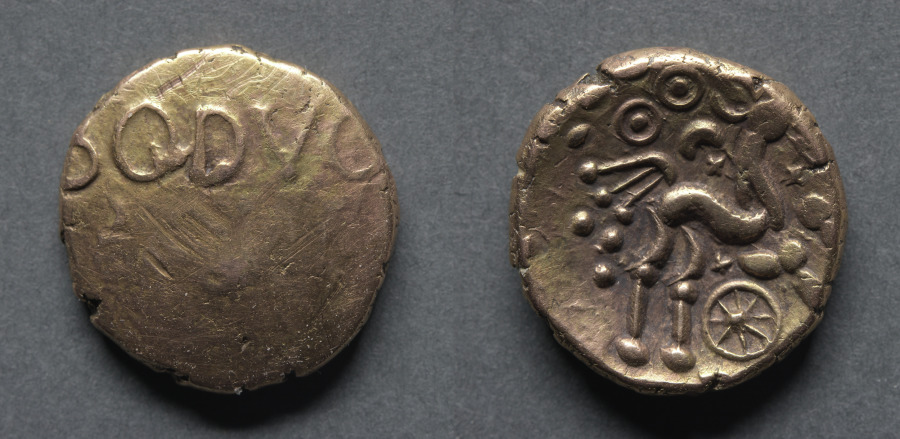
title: Stater: BODVOC on plain field (obverse); Horse, Wheel, and Crescent (reverse)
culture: England, Dobunni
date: 10 BCE–20 CE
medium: gold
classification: Coins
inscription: BODVO[C].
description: On coins in this same series the obverse legend (BODVOC) changes position. On some it is central across the field and complete, on others above and incomplete as seen here. As far as is known Bodvoc was one of the rulers of the Dobunni tribe. The horse has become even more crude, made up of lines and pellets and rough curves. The spokes of the wheel fail to meet nearly at the center.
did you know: The Dobunni were a tribe that lived on the British Isles prior to the Roman invasion of Britain.